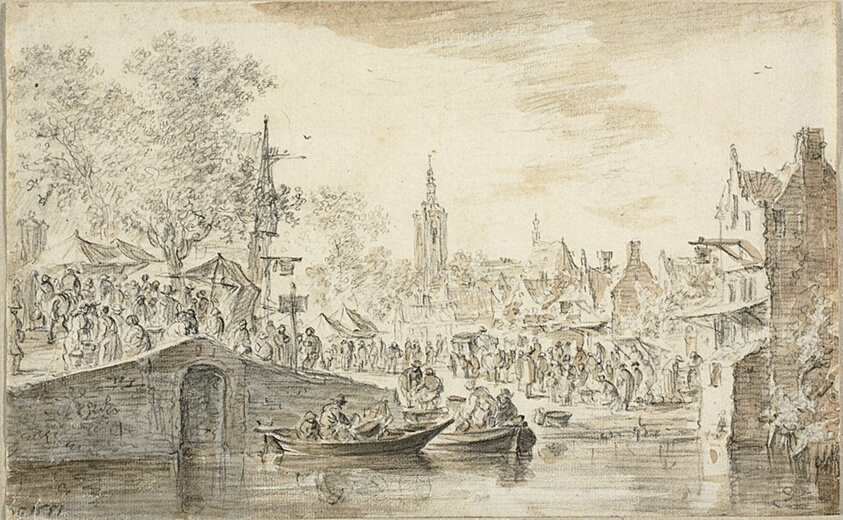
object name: Drawing and Watercolor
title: Market near a Canal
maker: Jan van Goyen (Dutch, 1596-1656)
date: 1651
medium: Black crayon and brush and brown and gray washes on ivory laid paper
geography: Netherlands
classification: graphite; drawings (visual works); prints and drawing